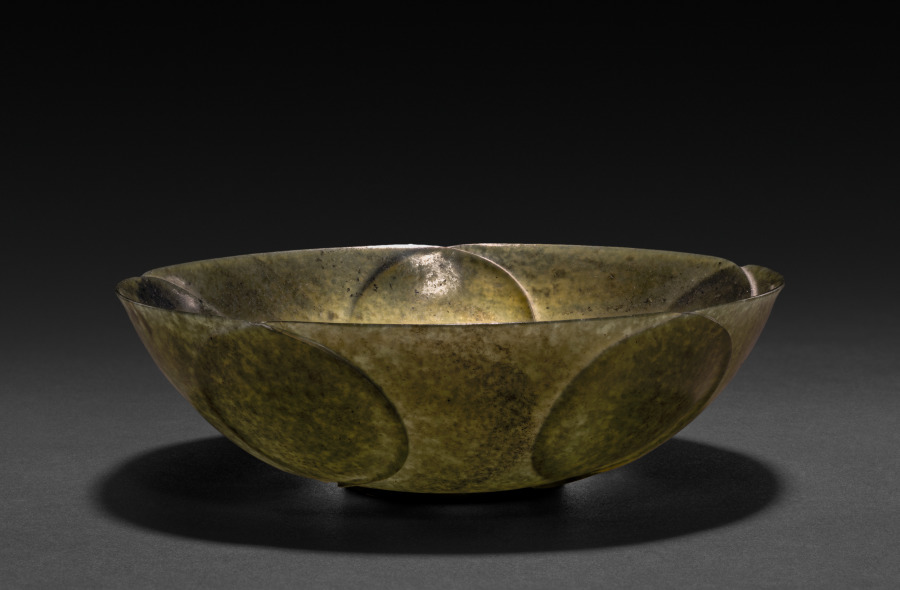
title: Lotus Bowl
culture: China, Qing dynasty (1644-1911)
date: 1700s or later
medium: jade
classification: Jade